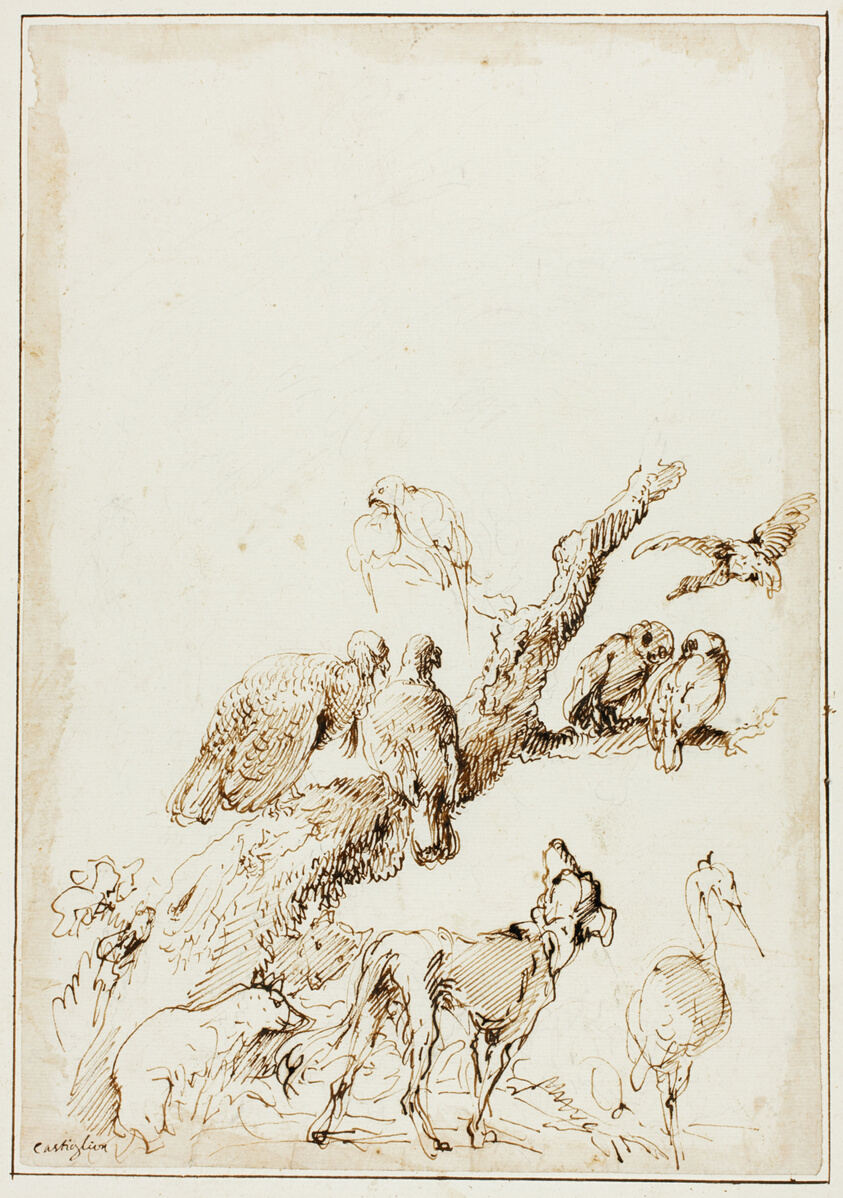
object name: Drawing and Watercolor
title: Birds and Animals around a Dead Tree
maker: Giovanni Benedetto Castiglione (Italian, 1609-1664)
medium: Pen and brown ink, with touches of black chalk, on ivory laid paper, perimeter mounted on ivory laid paper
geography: Italy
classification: drawings (visual works); prints and drawing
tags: dogs, animals